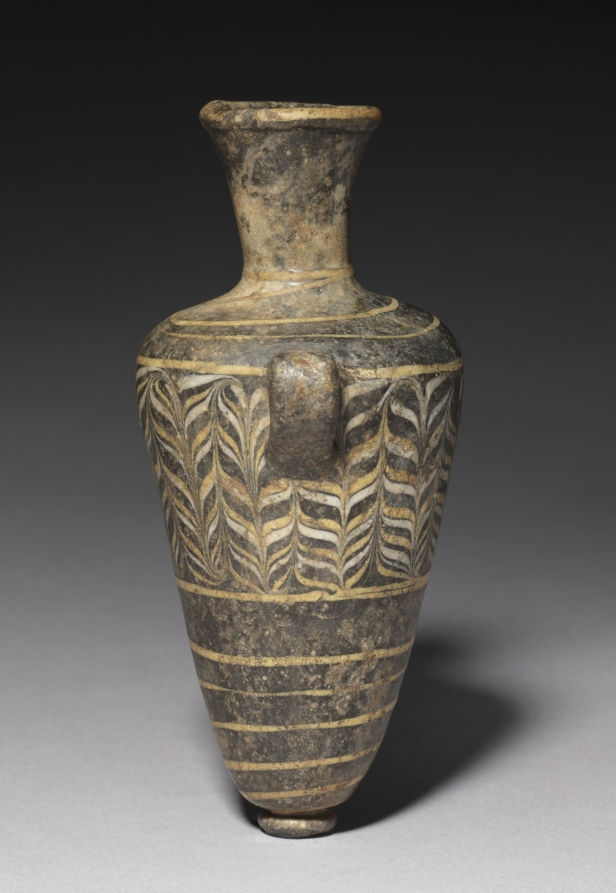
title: Unguent Bottle (Amphoriskos)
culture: Egypt, New Kingdom (1540–1069 BCE), Dynasties 18–19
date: 1549–1296 BCE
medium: glass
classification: Vessels